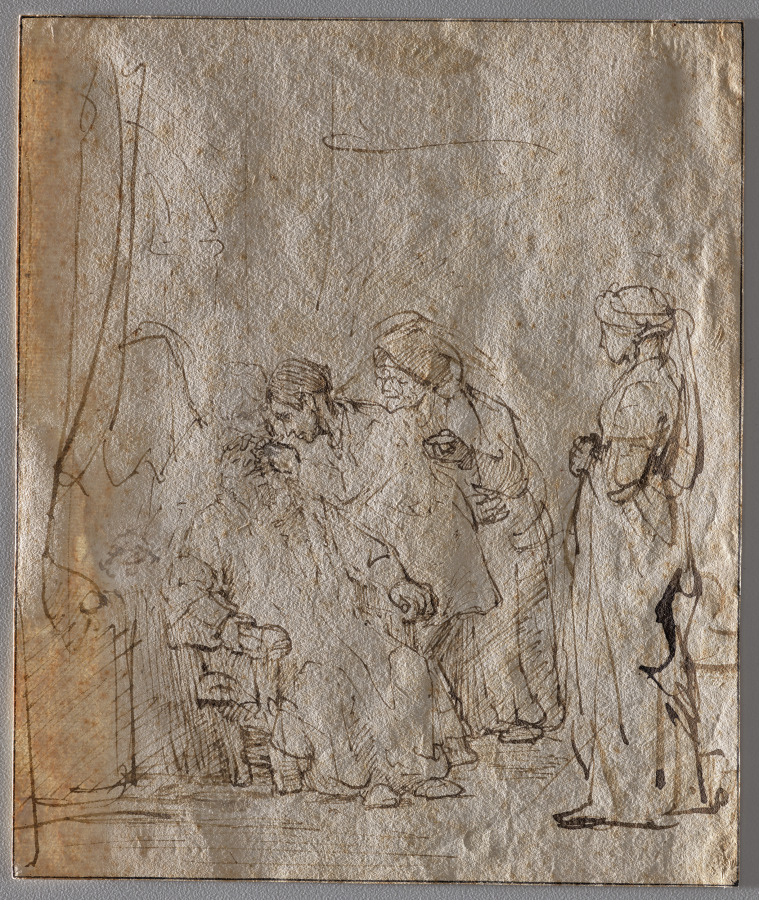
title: Tobias Healing His Father's Blindness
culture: Netherlands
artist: Rembrandt van Rijn (Dutch, 1606–1669)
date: c. 1640–45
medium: Pen and brown ink, touched with white gouache; framing lines in pen and brown ink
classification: Drawing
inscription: verso, upper center, in graphite: -13 [crossed out]; upper right, in black chalk: rembrant; upper right, in brown ink: D; upper center, in brown ink: [15-50?] / Tobias; upper left, in brown ink: 9 [sideways]; lower left, in brown ink: [illegible, cropped]; lower left, in brown ink: No 2910; lower left, in brown ink: Rembrandt; lower right, in brown ink: -d[l?]-13 [upside down]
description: This drawing is a prime example of the Dutch painter Rembrandt van Rijn's innovative approach to biblical narrative, in which he often humanized traditional pictorial formulas through the inclusion of observed details from everyday life. It depicts the climactic moment of the Book of Tobit, an apocryphal book of the Old Testament, in which, instructed by the archangel Raphael, Tobias heals his father Tobit's blindness by rubbing his eyes with fish gall. With spontaneity, a deft hand, and deceptive simplicity in his mark-making, Rembrandt depicts an intimate family scene including the archangel, Tobias, Hannah, and Sarah around a seated Tobit. Hannah’s spectacles, a unique detail among images of the scene created by Rembrandt and his circle, further thematizes sight. Rembrandt’s most innovative addition to the story centers on Tobias, who concentrates intensely to use a scalpel, rather than fish gall, to perform a cataract operation on his father’s left eye. Cataract surgery was a new procedure pioneered in Amsterdam in 1635 by Dr. Job Janszoon van Meekren, and Rembrandt may have witnessed the doctor perform it.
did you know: The seated figure in this drawing is receiving cataract surgery on his left eye, a procedure pioneered in Amsterdam in 1635 by Dr. Job Janszoon van Meekren.